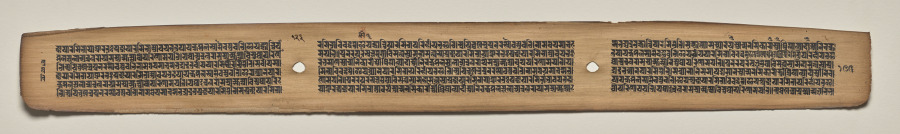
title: Text, Folio 123 (verso), from a Manuscript of the Perfection of Wisdom in Eight Thousand Lines (Ashtasahasrika Prajnaparamita-sutra)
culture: Eastern India, Bihar, Vikramashila Monastery. Painting: Nepal, Kathmandu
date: Sunday, September 14, 1119 (year 239 of the Newar Samvat in the month of Ashvina)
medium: gum tempera and ink on palm leaves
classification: Painting